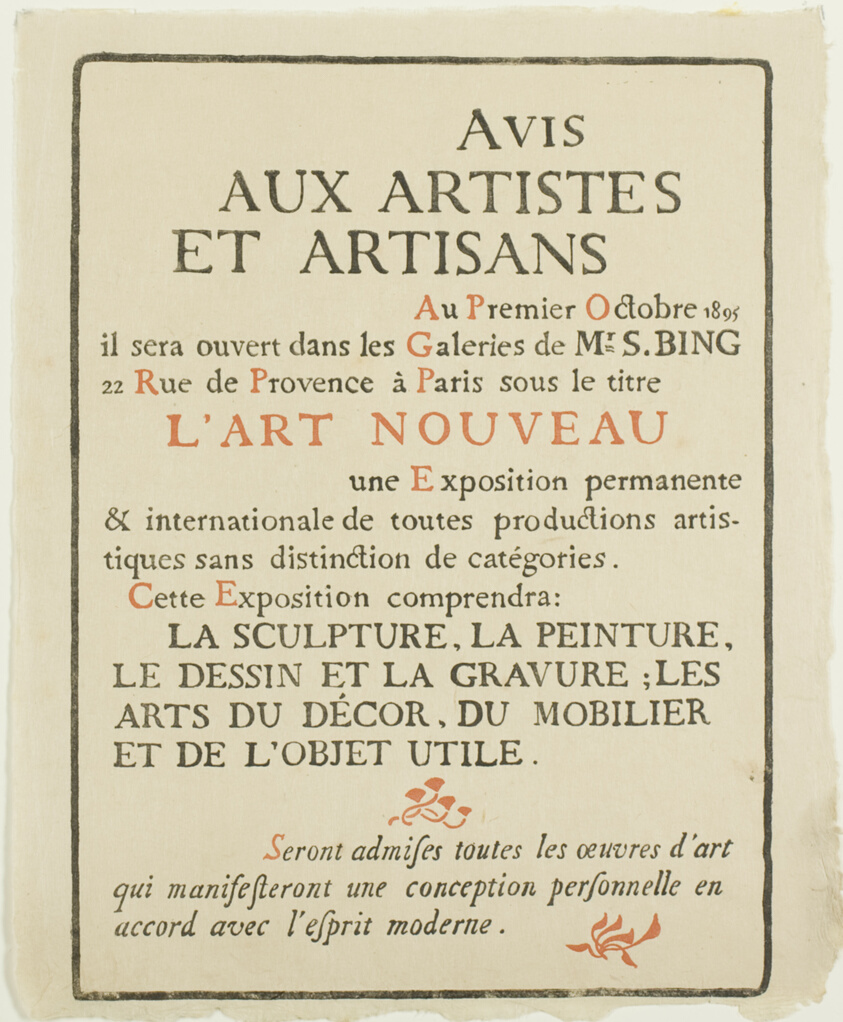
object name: Print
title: Avis aux Artistes et Artisans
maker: Georges Lemmen (Belgian, 1865-1916)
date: October 1895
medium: Letterpress in black and red on tan Japanese paper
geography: Belgium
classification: print; prints and drawing